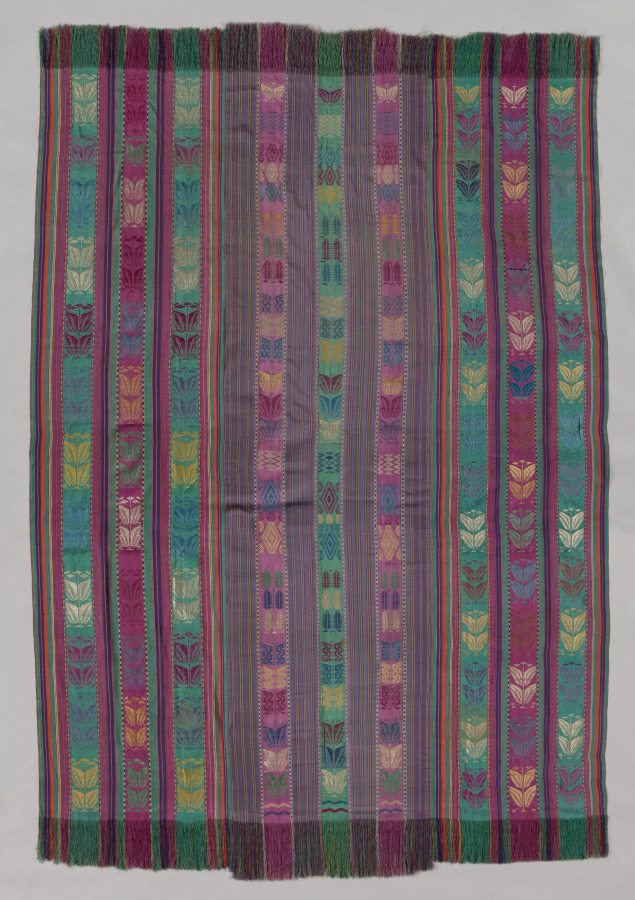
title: Wrapper (Lamba Akotifahana)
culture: Madagascar, Merina Kingdom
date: 1800s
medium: Silk (Bombyx mori)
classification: Textile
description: A lamba is an untailored textile worn by all ages, classes, and genders across much of Madagascar. The lamba akotifahana takes its name from the weft-float motifs (akotifahana) that adorn it. Weavers added extra weft (horizontal) threads to make them. Representing the final production of lamba akotifahana during the Merina Kingdom before French colonization (1897), this example is densely covered with motifs.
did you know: The motifs on this weaving are not symbolic; the weaver chose them for aesthetic reasons.